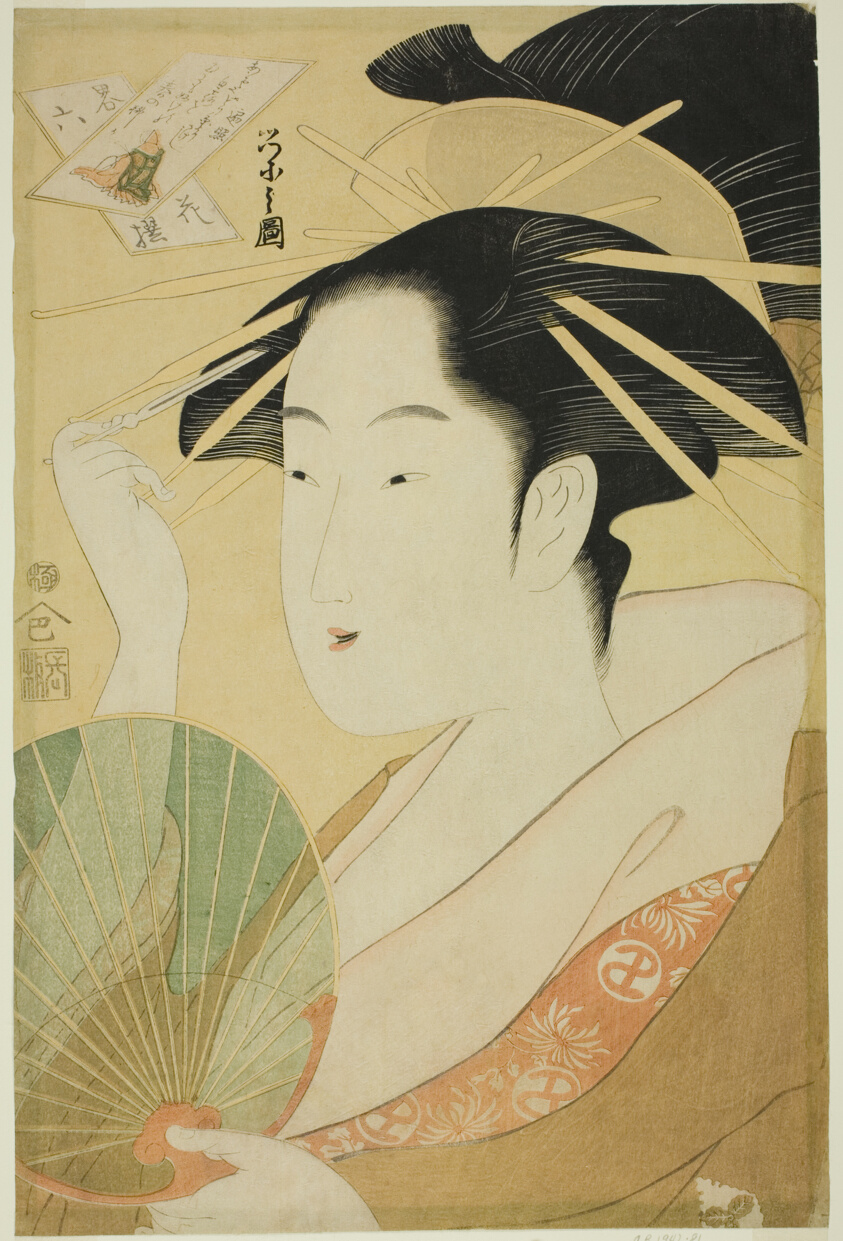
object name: Print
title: A Selection of Six Flowers - A Parody Rokkasen (Yatsushi rokkasen): Bishop Henjo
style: Japanese (culture or style)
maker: Chobunsai Eishi; Japanese, 1756-1829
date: c. 1798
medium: Color woodblock print; oban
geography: Japan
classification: woodblock print; print; asian art